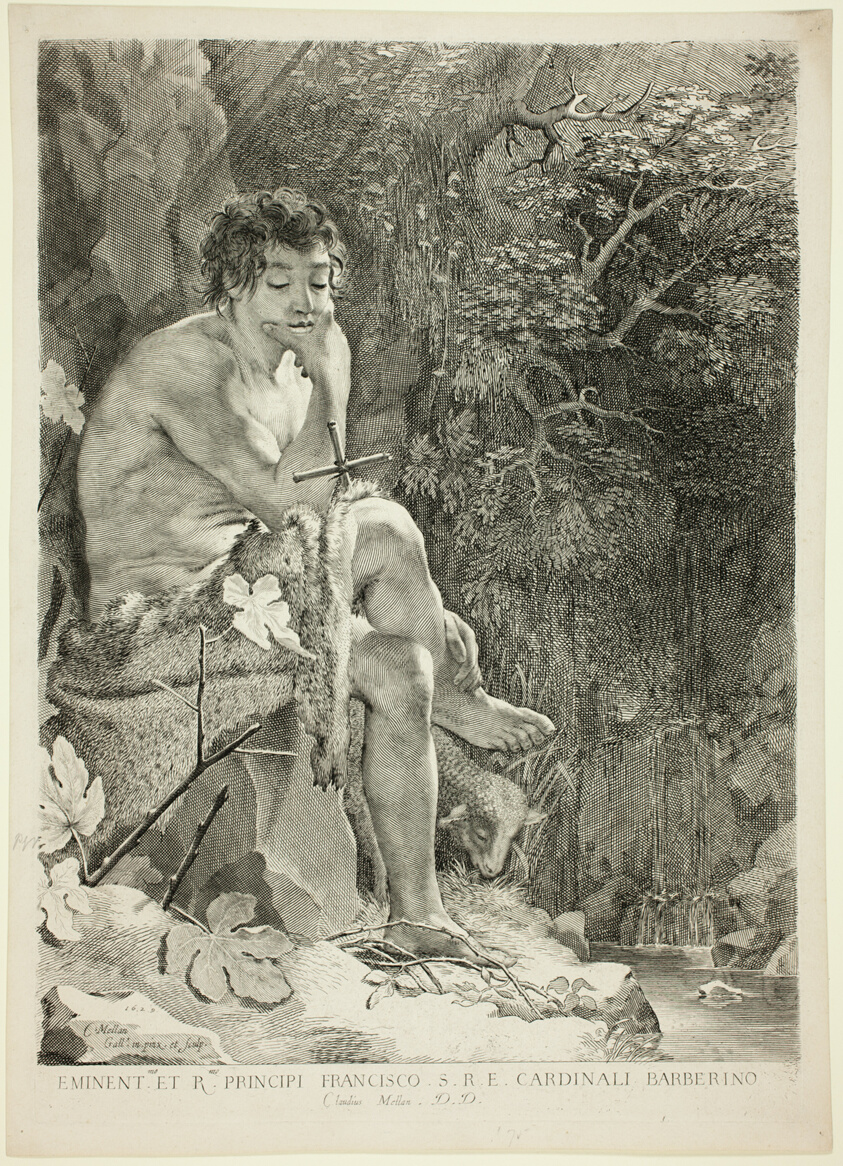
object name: Print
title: Saint John the Baptist in the Desert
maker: Claude Mellan (French, 1598-1688)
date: 1629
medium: Engraving in black on cream laid paper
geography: France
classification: engraving; paper; print; prints and drawing